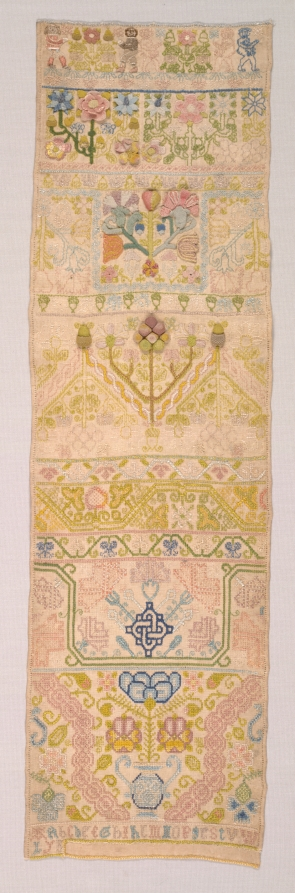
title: Long Sampler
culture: England, 17th century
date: 1600s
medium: embroidery: silk on linen tabby ground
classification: Sampler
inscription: below: "AbCDEFGhIkKMNOPQRStVW/ XYZ."